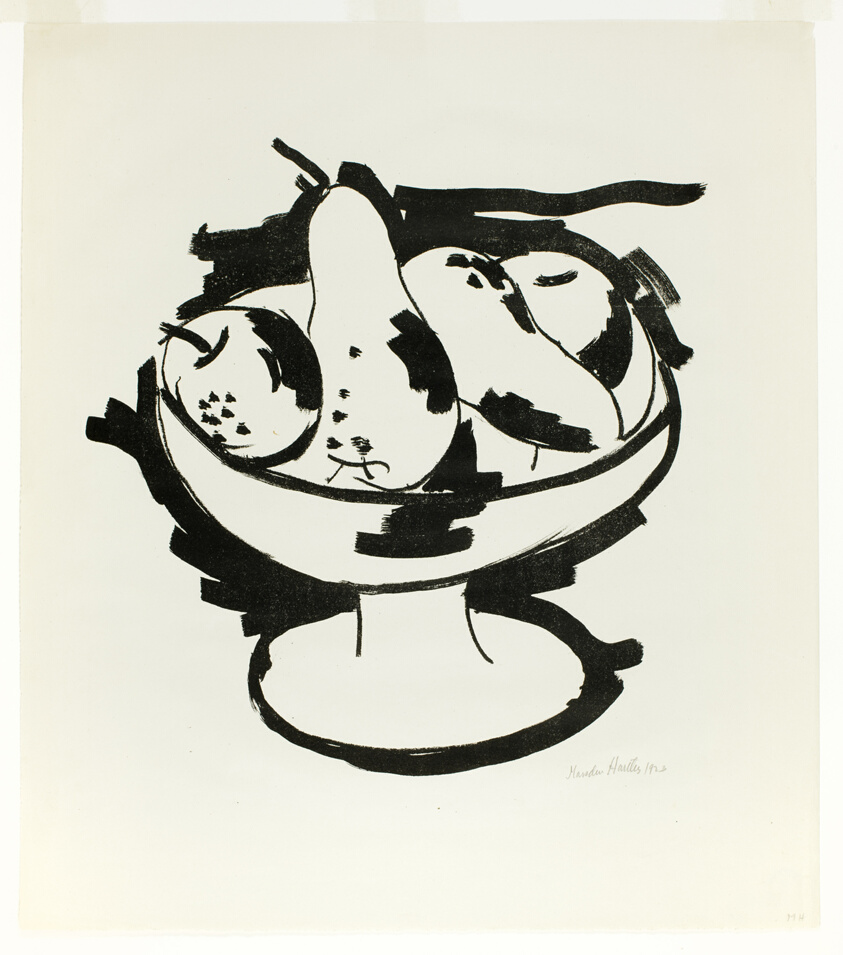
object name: Print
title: Bowl of Fruit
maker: Marsden Hartley (American, 1877-1943)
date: 1923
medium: Lithograph on white wove paper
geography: United States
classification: lithograph; print; prints and drawing